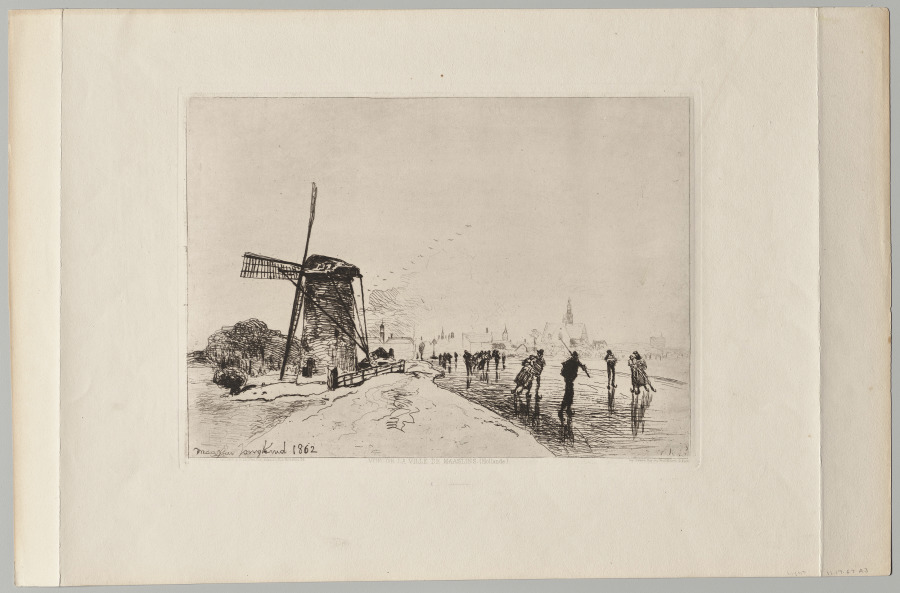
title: Vue de la Ville de Maaslins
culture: Netherlands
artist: Johan Barthold Jongkind (Dutch, 1819–1891)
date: 1862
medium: etching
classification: Print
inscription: inscribed in plate: Maaslins Jongkind 1862 (l.l)